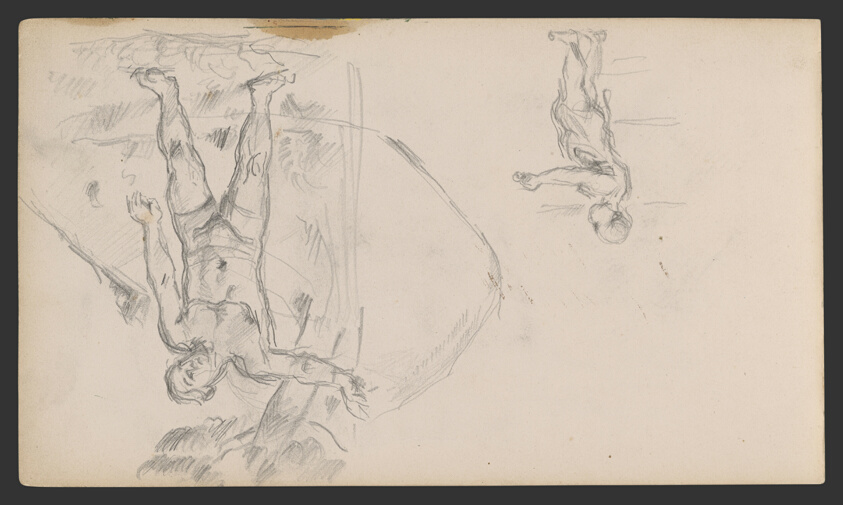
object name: Drawing and Watercolor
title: Sketchbook No. 2 (L'Estaque)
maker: Paul Cézanne; French, 1839-1906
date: 1875–86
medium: Graphite and pen and ink drawings on paper, bound into a book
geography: France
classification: sketchbook; graphite; prints and drawing; paper